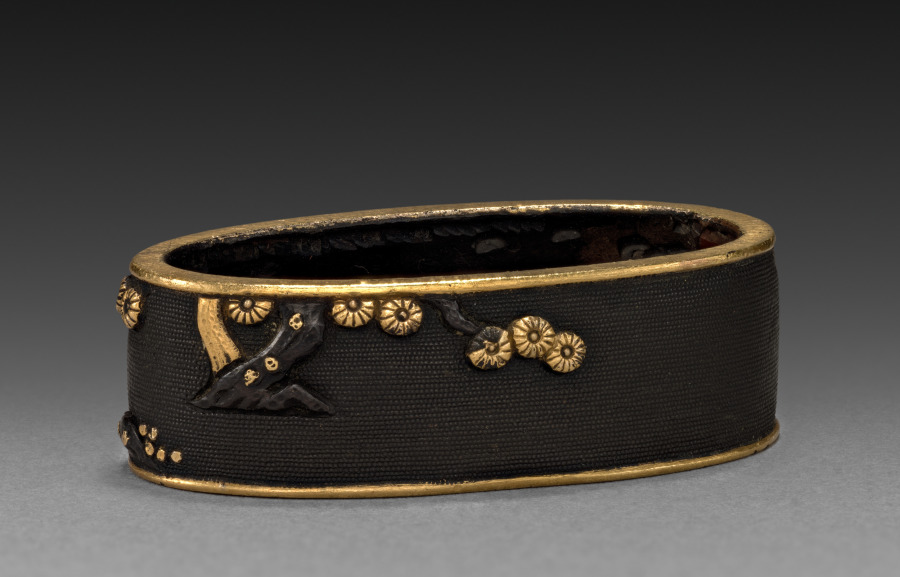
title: Sword-Hilt Collar (Fuchi)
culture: Japan, Edo period (1615–1868)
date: 1700–1850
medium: shakudo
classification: Arms and Armor